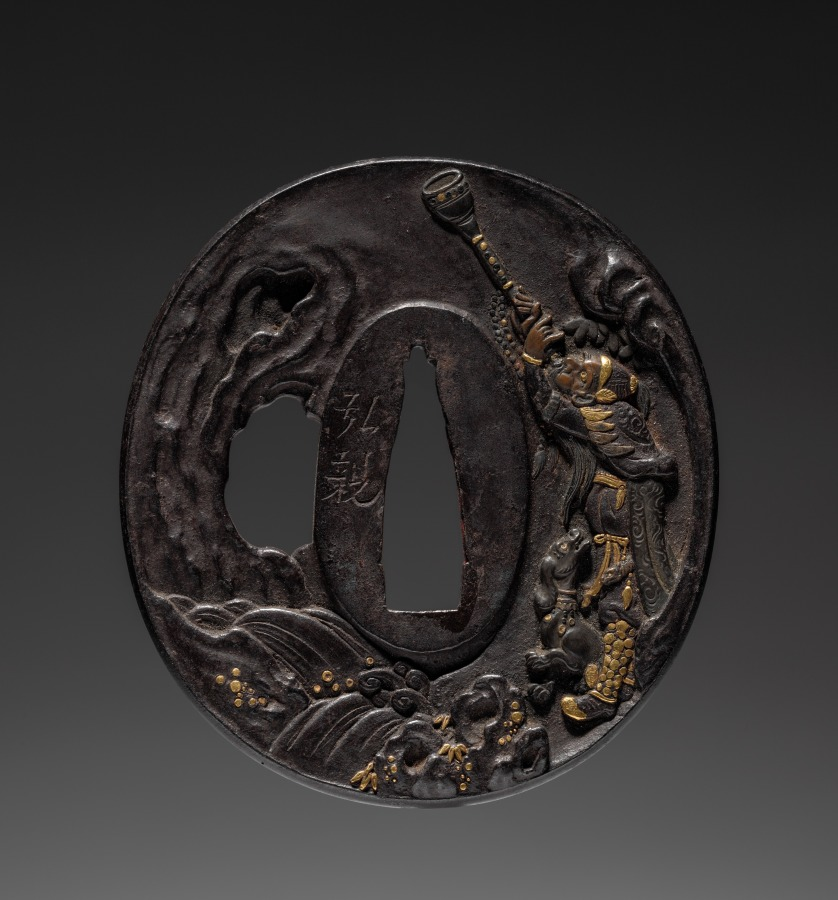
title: Sword Guard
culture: Japan, Edo period (1615–1868)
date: early 1800s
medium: iron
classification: Arms and Armor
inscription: Signature: Hirochika